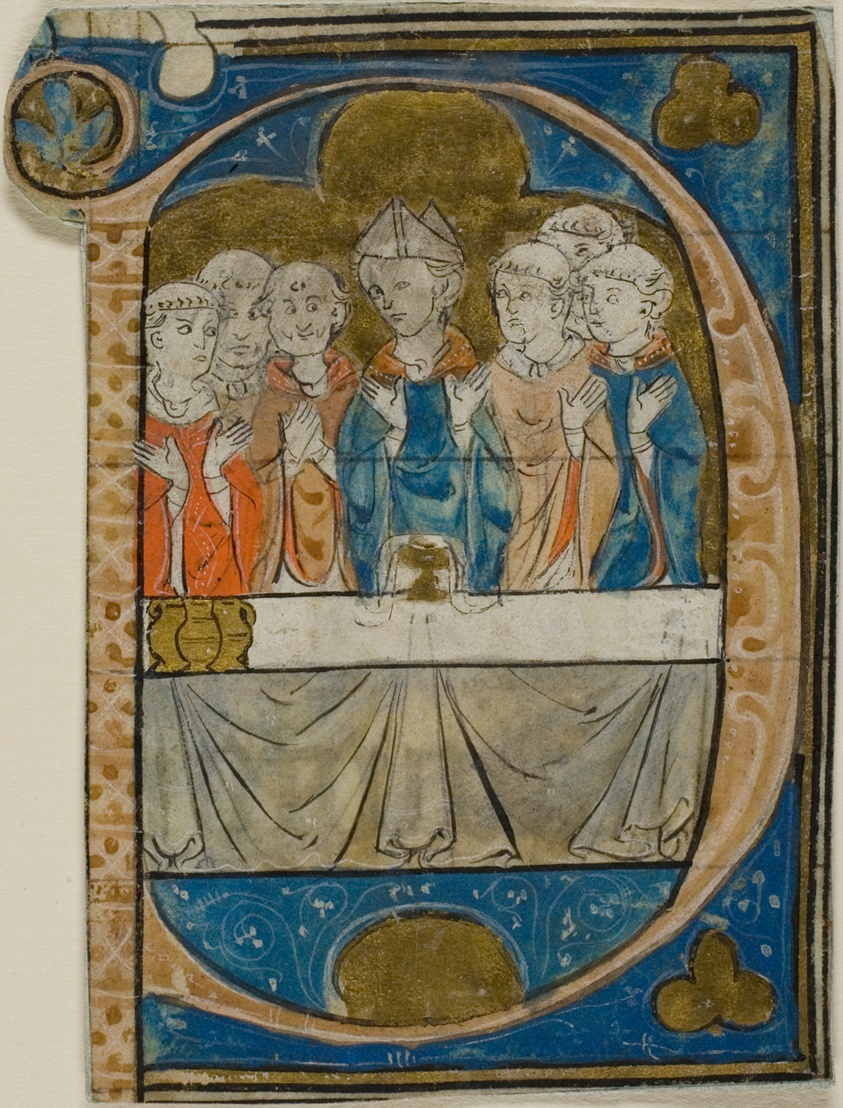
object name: Drawing and Watercolor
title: Bishop at Mass in a Historiated Initial "P" from a Choirbook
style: medieval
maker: French or possibly southern Netherlandish; follower of Master Honoré (French, flourished 1288-1300)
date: c. 1300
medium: Manuscript cutting in tempera and gold leaf, with Latin inscriptions in gothic book hand, verso, in black ink, on parchment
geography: France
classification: tempera; manuscript; drawings (visual works); prints and drawing